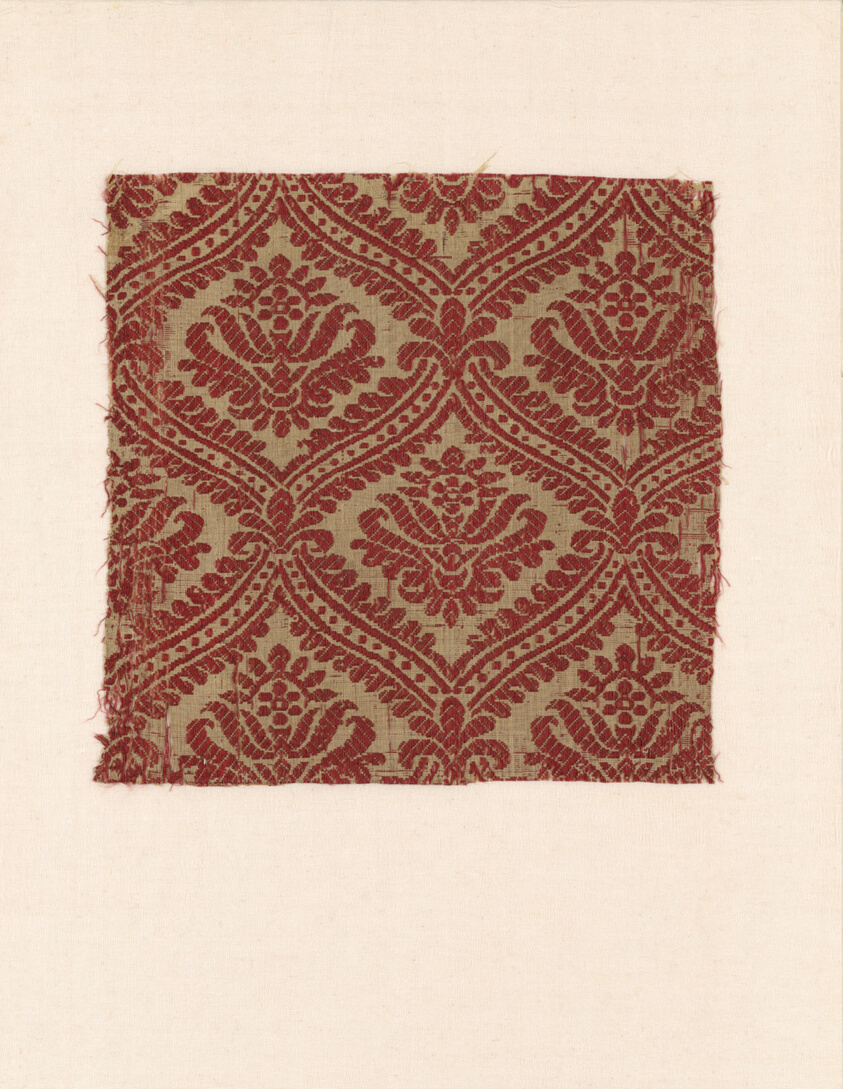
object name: Textile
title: Fragment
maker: Italy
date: 1625/75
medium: silk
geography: Italy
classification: textile; weaving